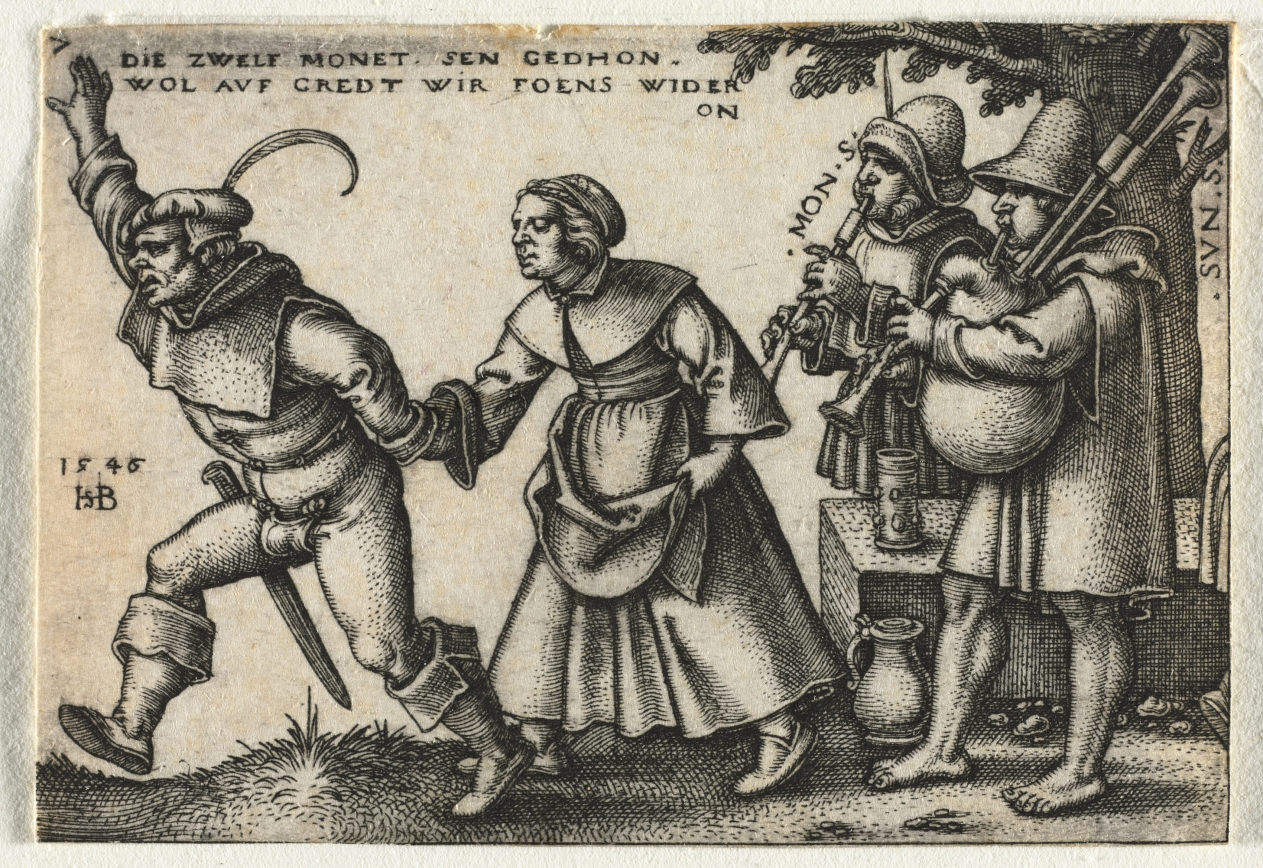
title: The Peasant Wedding or the Twelve Months: No. 7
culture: Germany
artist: Hans Sebald Beham (German, 1500–1550)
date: 1546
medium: engraving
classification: Print